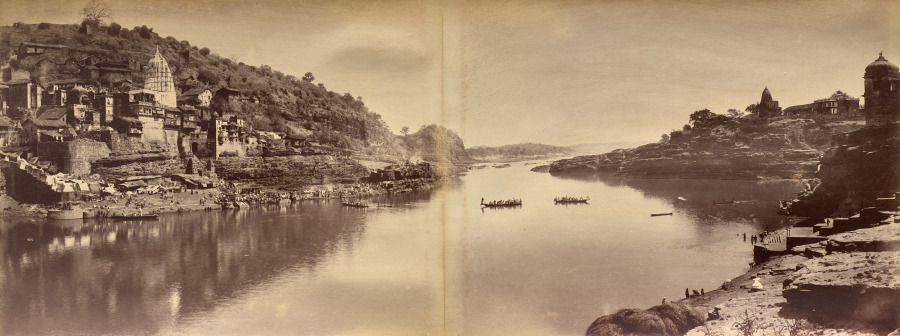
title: Two-Part Panorama with View of the Narmada River at Omkareshwar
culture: India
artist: Raja Deen Dayal (Indian, 1844–1905)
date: 1882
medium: albumen print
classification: Photograph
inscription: Inscription at center left edge of left-side print: "1615"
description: This stunning panorama boldly places the sacred Narmada River in the middle and foreground. Raja Deen Dayal forces the viewer’s eye to journey between the left-hand island with Omkareshwar Temple, an important pilgrimage site that is one of 12 revered Jyotirlinga shrines of Shiva, and Mamleshwar, a shrine to Shiva on the river’s south bank, which is on the mainland.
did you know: The temple on the left is believed to one of 12 places—Jyotirlinga shrines—where the Hindu god Shiva appeared as a bright column of light.